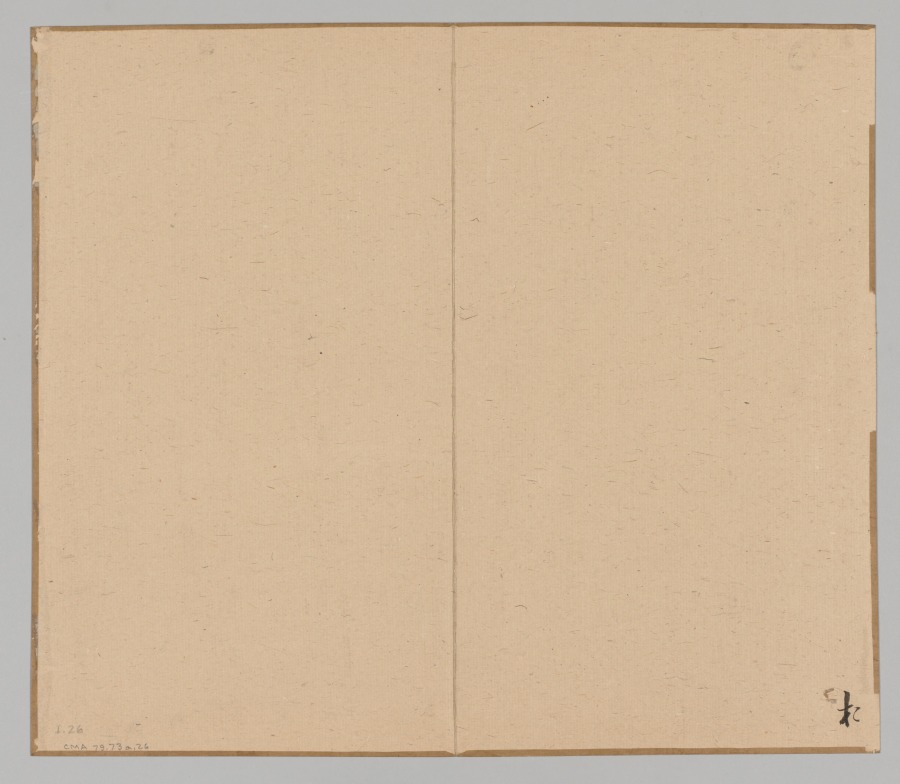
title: Reverberations of Taiga, Volume 1 (leaf 26)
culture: Japan, Edo period (1615–1868)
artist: Aoki Shukuya (Japanese, d. 1802)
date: mid- to late 1700s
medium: double-leaf from a pair of albums; ink and light color on paper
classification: Portfolio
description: Traditionally, young painters in Japan began their studies with an established master-painter. The master's compositions invariably became models that the apprentice copied to learn various ink and brush techniques. Shukuya was a pupil of the famous Kyoto artist Ikeno Taiga, whose style is reflected in these sketches of rocks, trees, and mountains.